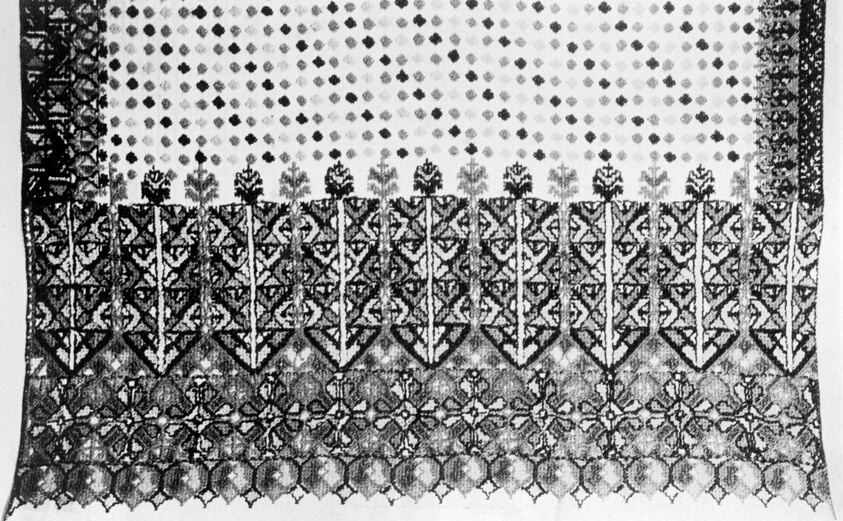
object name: Costume and Accessories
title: Scarf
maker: Morocco, Meknès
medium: Silk; embroidered on cotton voile with check woven by thicker threads; Holbein stitch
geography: Morocco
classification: textile; costume; weaving; needlework (visual works); dress (garment); clothing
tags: morocco